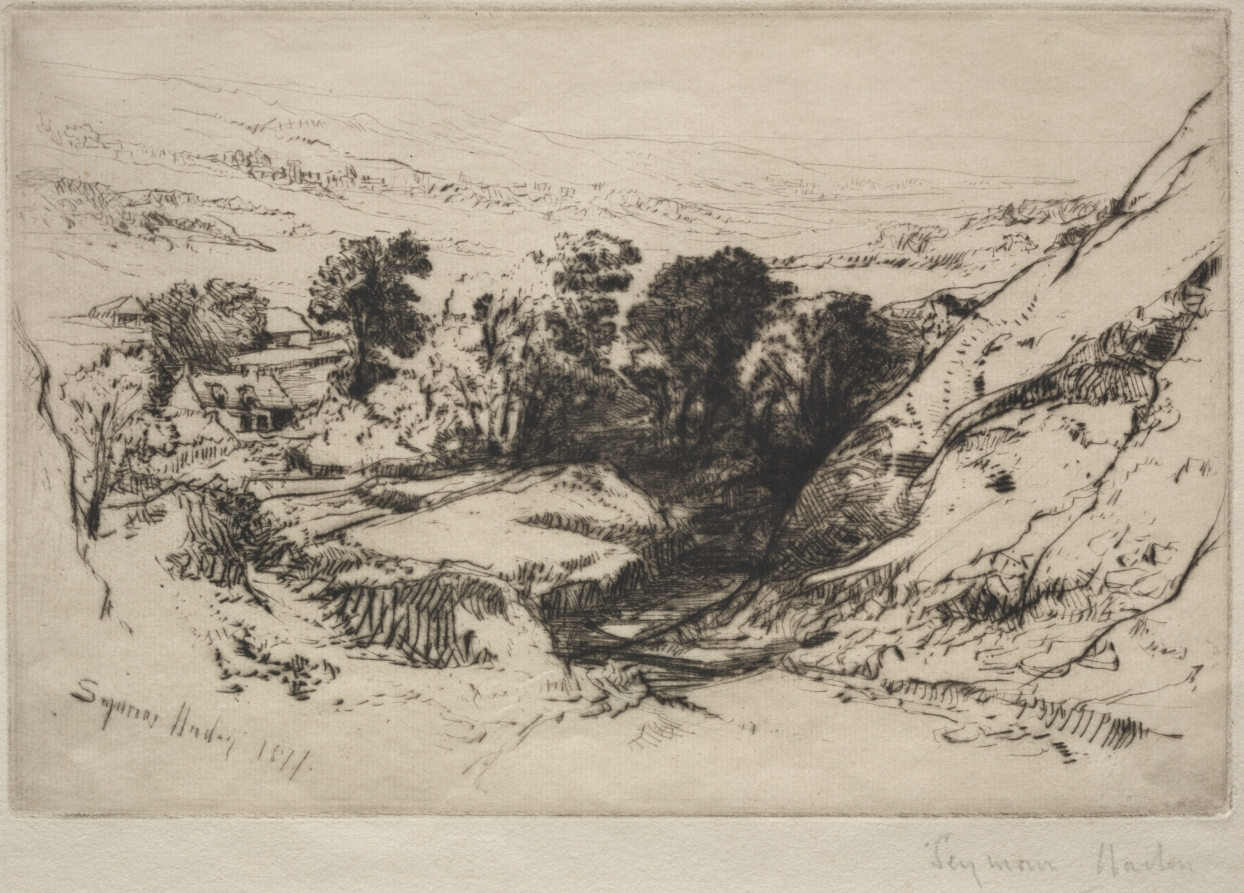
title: Nine Barrow Down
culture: England, 19th century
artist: Francis Seymour Haden (British, 1818–1910)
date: 1877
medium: drypoint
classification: Print